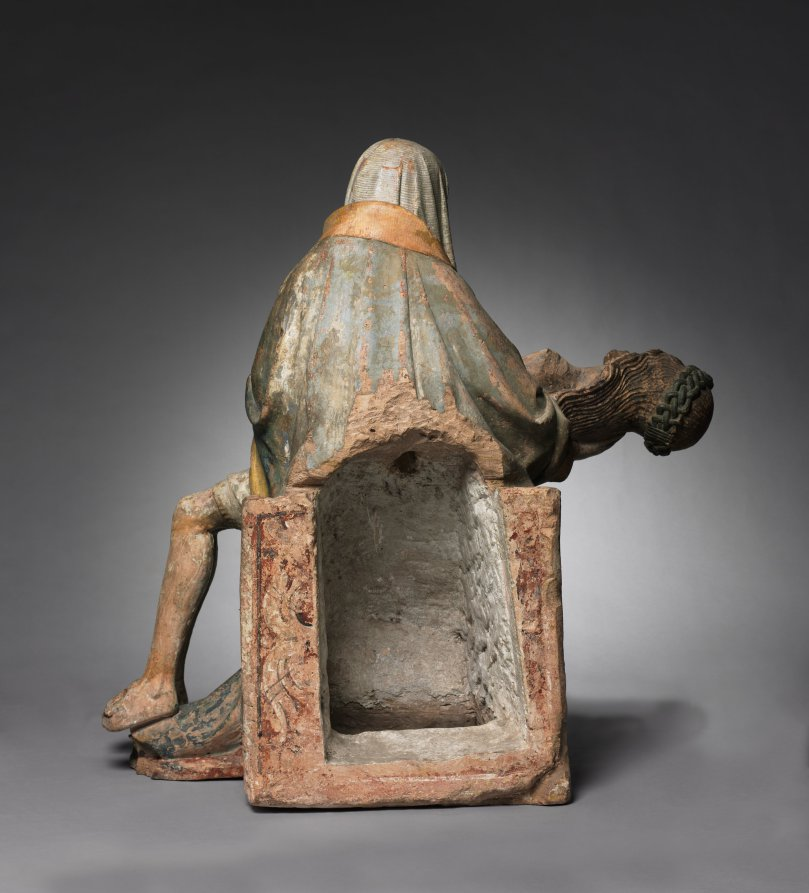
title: Vesperbild (Pietà)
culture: Austria, Steiermark, 15th century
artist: Master of Grosslobming (Austrian)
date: c. 1420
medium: painted cast stone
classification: Sculpture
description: The word vesperbild is the German word for pietà, the image of the Virgin Mary cradling her dead son on her lap. The theme has no literary source; it originated in Germany during the early 1300s and was more widespread in central Europe than in Italy. These devotional sculptures were used within the interior of a church, in small side chapels dedicated to the Virgin. As in this example, they often convey her grief in a sensitive way. For those who prayed before them, vesperbilds were poignant reminders of the Passion of Christ and the suffering of the Virgin.